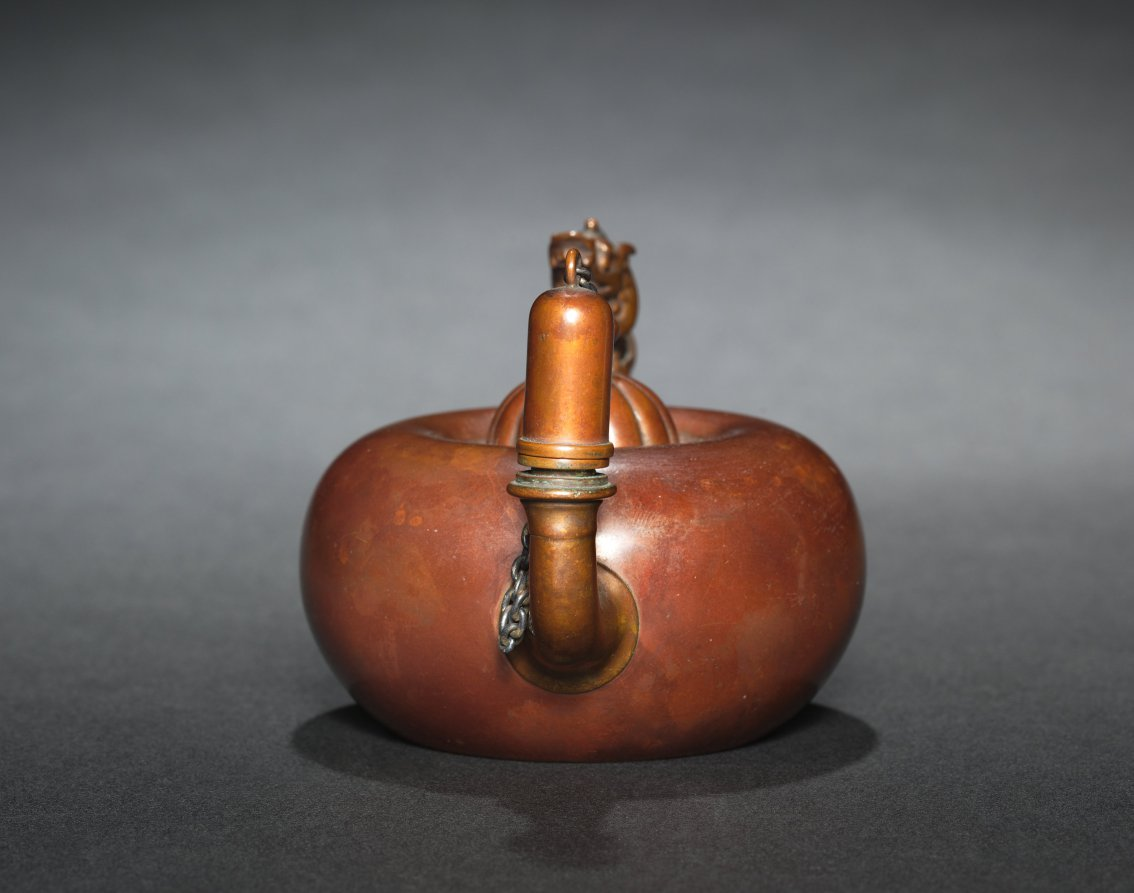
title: Oil Lamp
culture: America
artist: Gorham Manufacturing Company (America, est. 1831)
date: 1880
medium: copper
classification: Metalwork